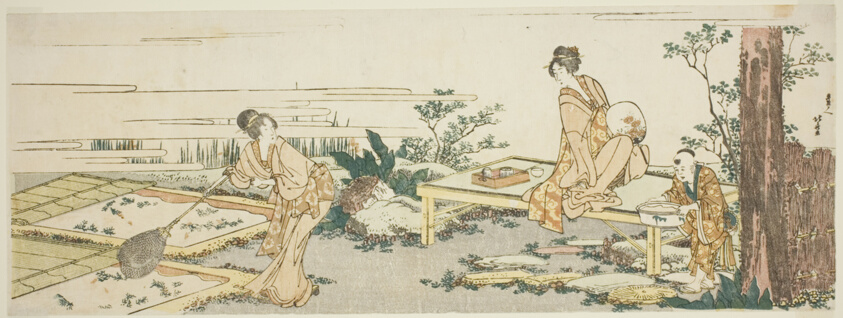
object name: Print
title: Goldfish farm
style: Japanese (culture or style)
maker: Katsushika Hokusai 葛飾 北斎; Japanese, 1760-1849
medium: Color woodblock print; nagaban, surimono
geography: Japan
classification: woodblock print; print; asian art